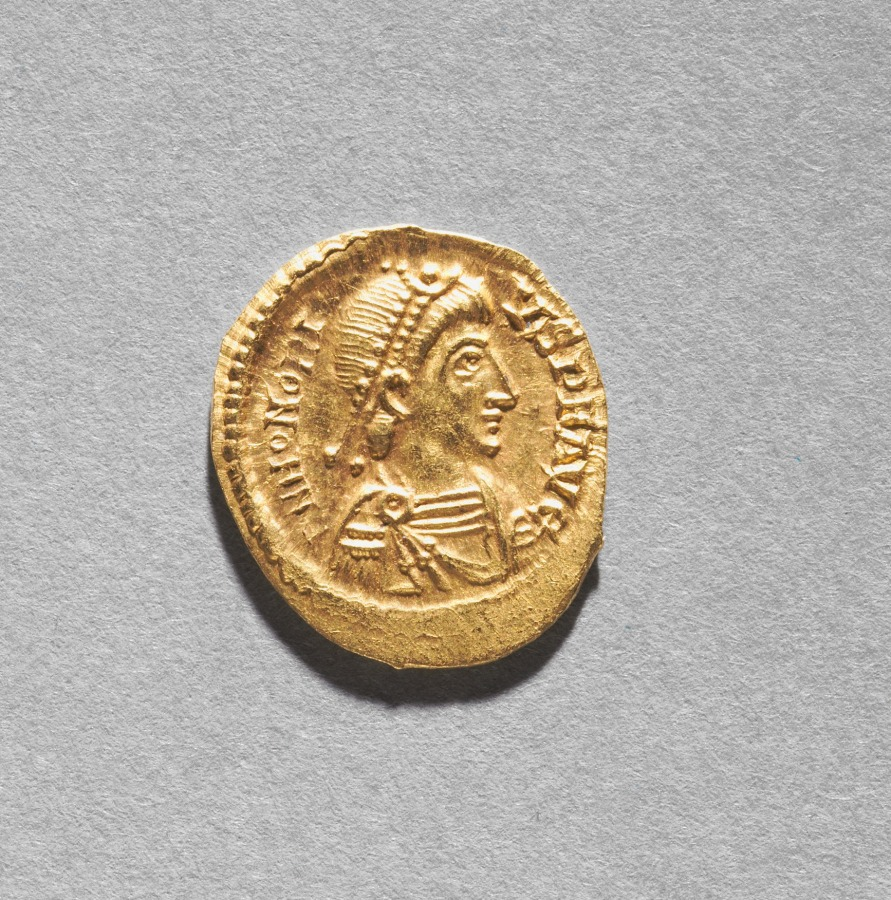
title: Solidus of Arkadios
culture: Byzantium, Constantinople, Byzantine period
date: 395–408 CE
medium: gold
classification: Coins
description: The vast number of surviving Byzantine coins attests to the level of trade across the empire. Controlled and supervised by the emperor, the producers of coins took care to represent his authority and reflect his stature. Talented artists were recruited to engrave the dies (molds) used for the striking of coins. Emperors increasingly came to include their heirs and co-emperors on their coinage, as well as other family members or even earlier rulers. Coins were recognized, then as now, as small, portable works of art. With their inscriptions and images, Byzantine coins provide valuable documentation of historical events and a record of the physical appearance of the emperors. The coins shown here include the solidus, the basic gold coin of 24 karats; the tremissis, a gold coin of one-third the weight and value of the solidus; and the nomisma, which in the 10th century replaced the solidus as the standard gold coin.